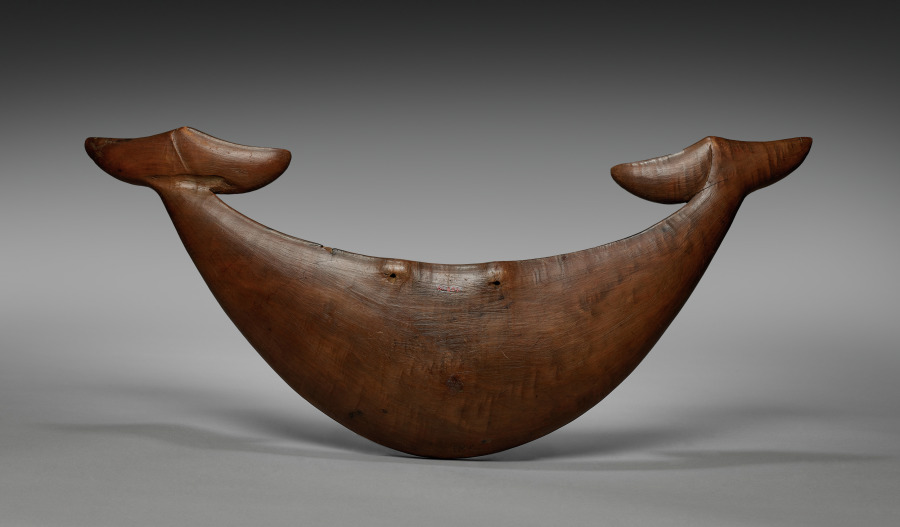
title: Gorget (Rei Miro)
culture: Pacific Islands, Polynesia, Rapa Nui (Easter Island)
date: 1800s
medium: wood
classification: Sculpture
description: Elegant, crescent-shaped gorgets or chest ornaments known as rei miro (“necklace of wood”) were generally worn by chiefly women of Rapa Nui (Easter Island). The abstracted forms at the tips of this example replace the human heads that are more typical.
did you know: Chiefly women of Rapa Nui (Easter Island) wore crescent-shaped gorgets like this one.